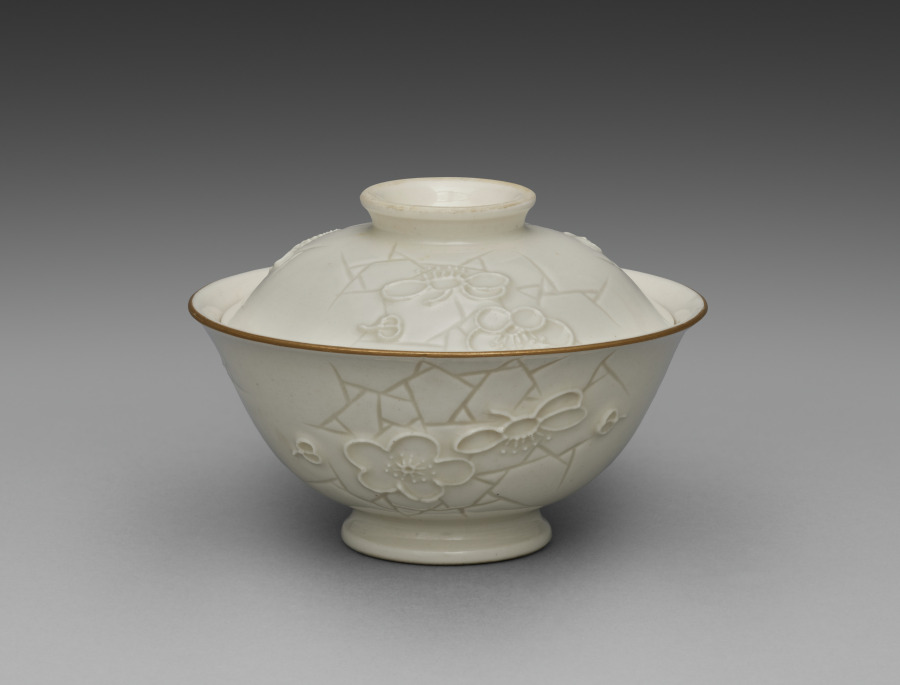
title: Covered Bowl from Dining Set with Plum Blossoms and Cracked-Ice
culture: Japan, Meiji period (1868–1912)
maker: Seifū Yohei II (Japanese, 1844–1878)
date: c. 1875–78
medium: Porcelain with molded designs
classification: Ceramic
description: Each item in this set has a delicate low-relief design of flowering plum branches over scattered, intersecting lines meant to resemble the cracked-ice surface of a frozen body of water and is signed on the base in gold pigment. While Yohei II produced many fine works in underglaze blue, like those produced by Kiyomizu Shichibei, he also made works in quite different styles later in his career, from the early 1870 s. In 1873, he was appointed purveyor to the Industrial Center of Kyoto Prefecture, a designation associated with Kyoto’s efforts to reach an international market through the port of Kobe; and from 1875 until his death, he was involved in national-level projects to present Japanese ceramics across the world. It was during this period that Yohei III was apprenticed to Yohei II, and it has been suggested that this set may in fact be an early example of Yohei III’s work, which he signed with his teacher’s name. Decorated with flowers resembling Japanese textile motifs, the set calls to mind the design of Yohei II’s pair of vases with plum blossoms in the Victoria and Albert Museum. Here, the elaborate trees created for a formal public exhibition setting have been translated into the approachable blossoms of the genteel domestic environment. While the designs are consistent across the pieces, each raised flower petal and pistil and each incised line in the ice was done by hand, so the cups, bowls, and dishes are similar yet unique. The bottoms of two boxes once identified the set’s owner, but the information has been deliberately obscured with black ink. However, inscriptions still visible appear to indicate two occasions, once at the end of July 1886 , and once again in June 1916 , when parts of the set were requested from Hokura in Niigata Prefecture. The location corresponds to a neighborhood in the present-day city of Jōetsu. The surname Tsuji 辻 also appears on a paper tag affixed to one of the box cloths. Future research may possibly reveal more about their provenance. A vase by Yohei III in a private collection combines the formal grandeur of the Yohei II vases in the Victoria and Albert Museum with the gentler design of this dining set, placing flowering plum trees against soft, scalloped-edge clouds resembling those in golden screens.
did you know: The dining wares have a creamy white coloration that the four boxes containing them identify as Korean in style.